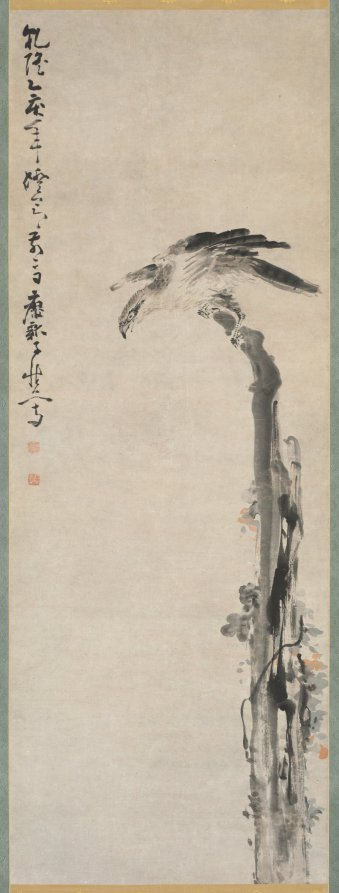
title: Eagle on a Tree Trunk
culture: China, Qing dynasty (1644–1911), Qianlong reign (1736–95)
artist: Huang Shen (Chinese, 1687–after 1768)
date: 1755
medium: Hanging scroll; ink and color on paper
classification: Painting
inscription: 乾隆乙亥年燈節前二日癭瓢子慎写。 [印]黃慎; 恭壽。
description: Huang Shen’s swift painting style is paralleled in his calligraphy. The vertical line in running script echoes the fluid form of the eagle on a tree trunk covered with a twisted vine. A native of Fujian province, Huang came to Yangzhou in 1724 to make his living as a painter. He needed years to develop a style that met the taste of his clients. He eventually became known as a figure painter and as one of the Eccentrics from Yangzhou, a group of local artists known for their unorthodox painting style.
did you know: With its wings partially lifted and sharp beak open in expectation, the eagle seems intent on some unseen prey below.